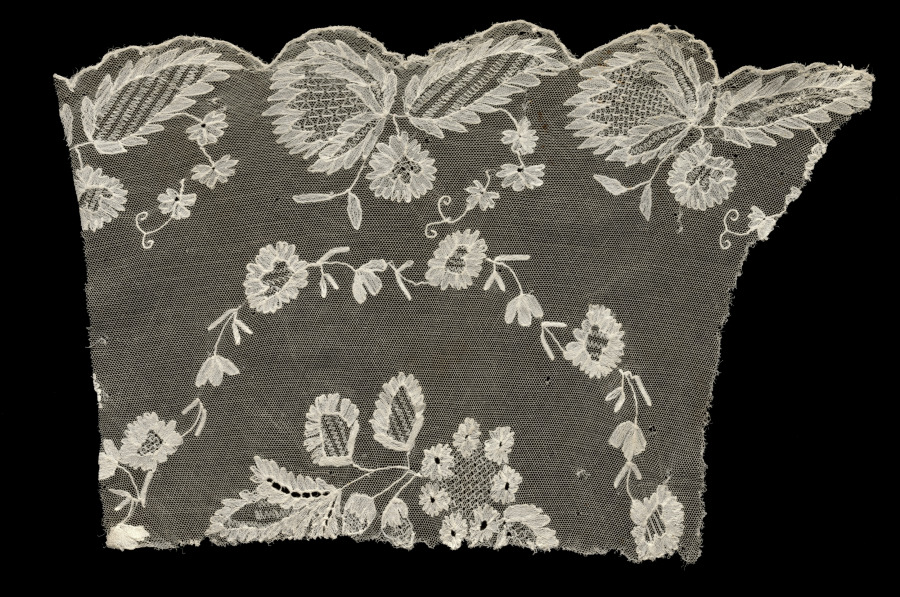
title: Lace Fragment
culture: Spain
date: 1811–15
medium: Machine-made lace (embroidered net)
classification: Lace